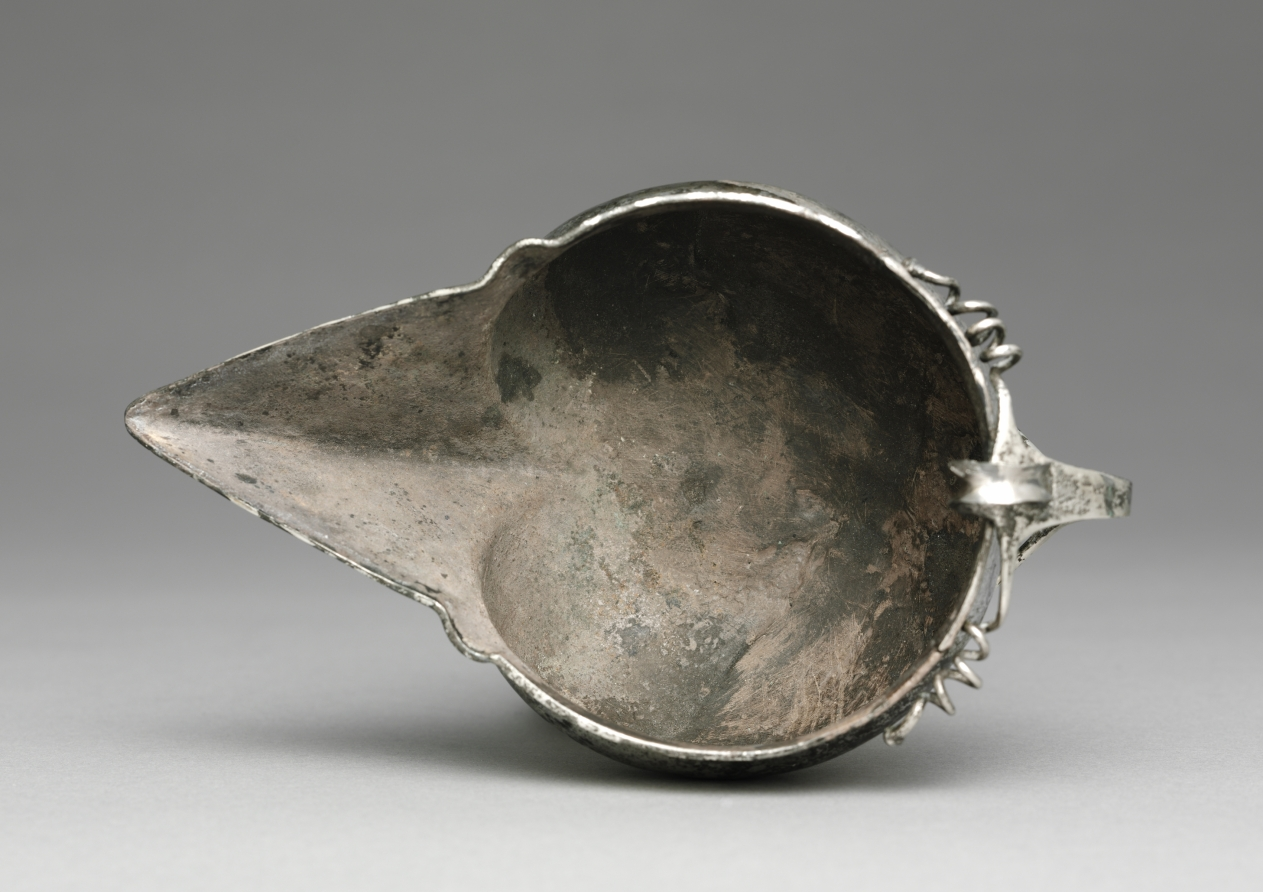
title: Spouted Pitcher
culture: Byzantium, Syria(?), Byzantine period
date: 300–600 CE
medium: silver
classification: Metalwork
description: A large quantity of tableware survives from the Roman Empire, including this piece from Antioch and the Eastern Mediterranean. Most of the recovered groups of silver seem to have been hoards concealed during times of trouble. A complete table service, called a ministerium in Latin and a synthesis in Greek, consisted of silver for eating and drinking: trays, platters, plates, dishes, spoons, pepper dispensers, goblets, pitchers, ladles, and bowls. The god of wine, Dionysos, was frequently depicted on drinking and eating vessels.